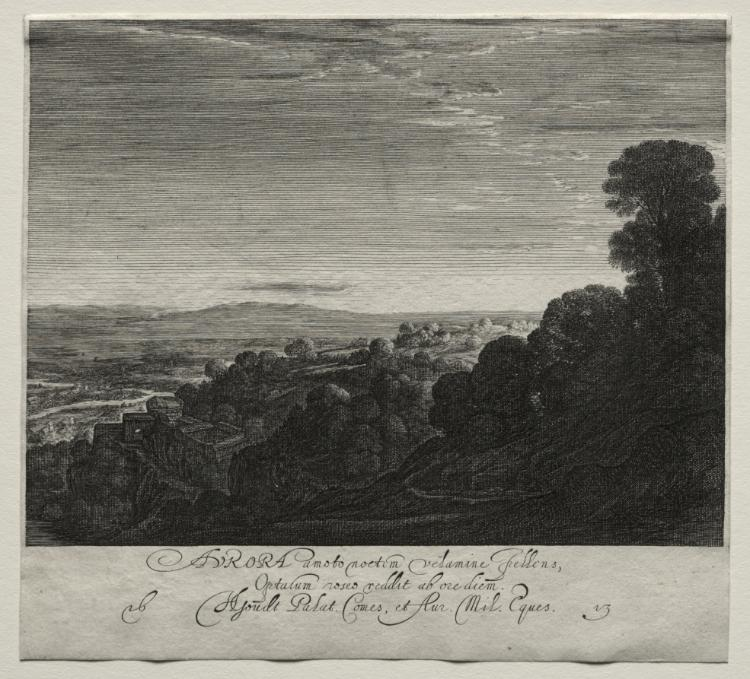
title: Aurora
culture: Netherlands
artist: Hendrik Goudt (Dutch, 1583–1648)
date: 1613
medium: engraving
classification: Print